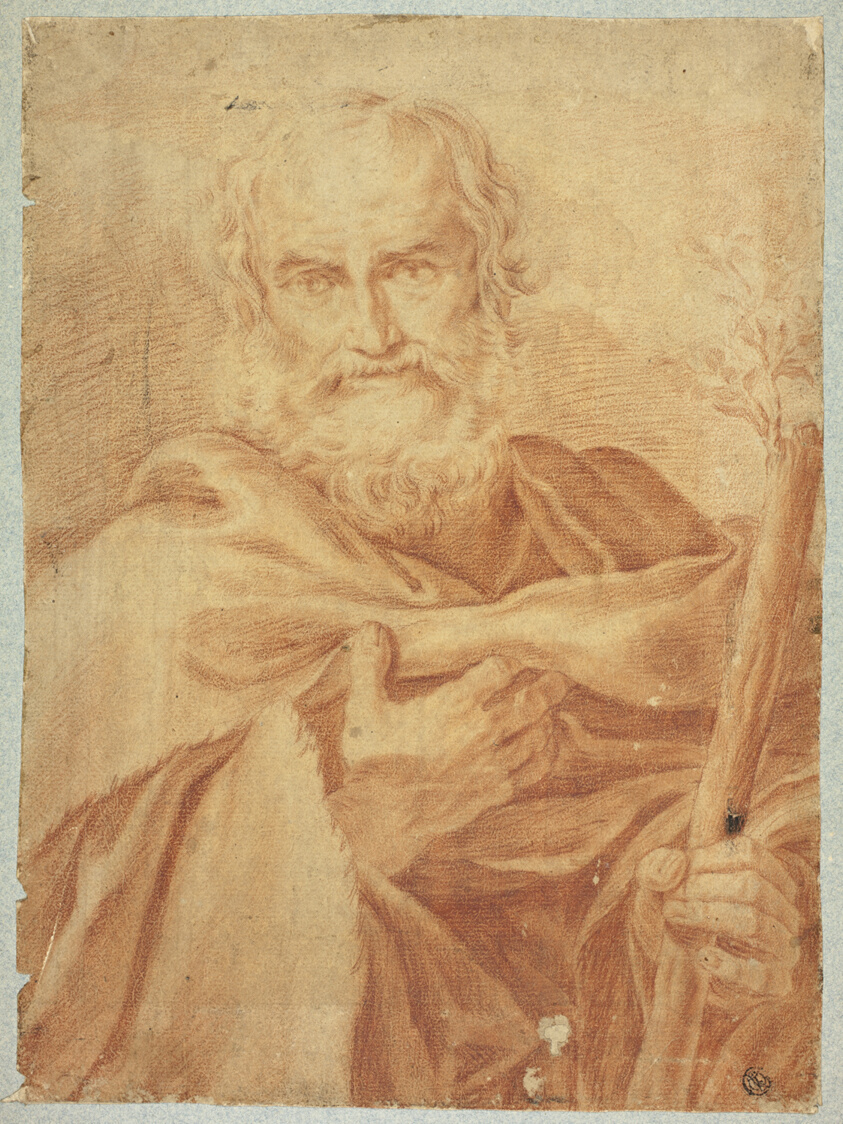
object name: Drawing and Watercolor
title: Saint Joseph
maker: Possibly after Tommaso Conca; Italian, before 1770-1815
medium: Red chalk with stumping on cream laid paper, laid down on blue covered paper, laid down on ivory board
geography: Italy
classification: chalk; paper; drawings (visual works); prints and drawing